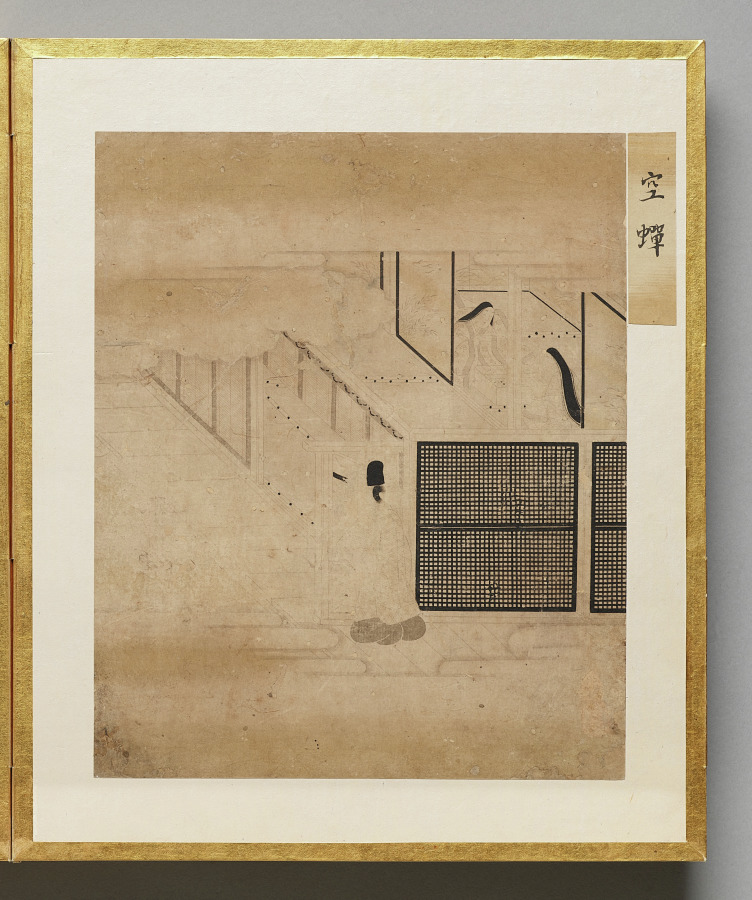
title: Shell of the Locust from Album of Illustrations for the Tale of Genji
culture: Japan, Edo period (1615–1868)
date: 1600s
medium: painting in an accordion-style album; ink, light color, and gold on paper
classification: Bound Volume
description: This album contains illustrations for the classic literary work the Tale of Genji, authored in the 1000s by Murasaki Shikibu, an aristocrat of the Heian period (794–1185) court. The scenes are painted in the “white drawing” (hakubyō) mode, in which a fine ink line is used to depict figures and spaces with great subtlety, punctuated only occasionally by traces of red pigment for a character’s lips, a detail of a garment, or a decorative element. These two scenes illustrate episodes from the chapters “Thin Veil of Cloud” (Usugumo) and “Barrier Gate” (Sekiya).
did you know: The illustrations are identified by chapter title in cartouches to the upper right of the paintings.